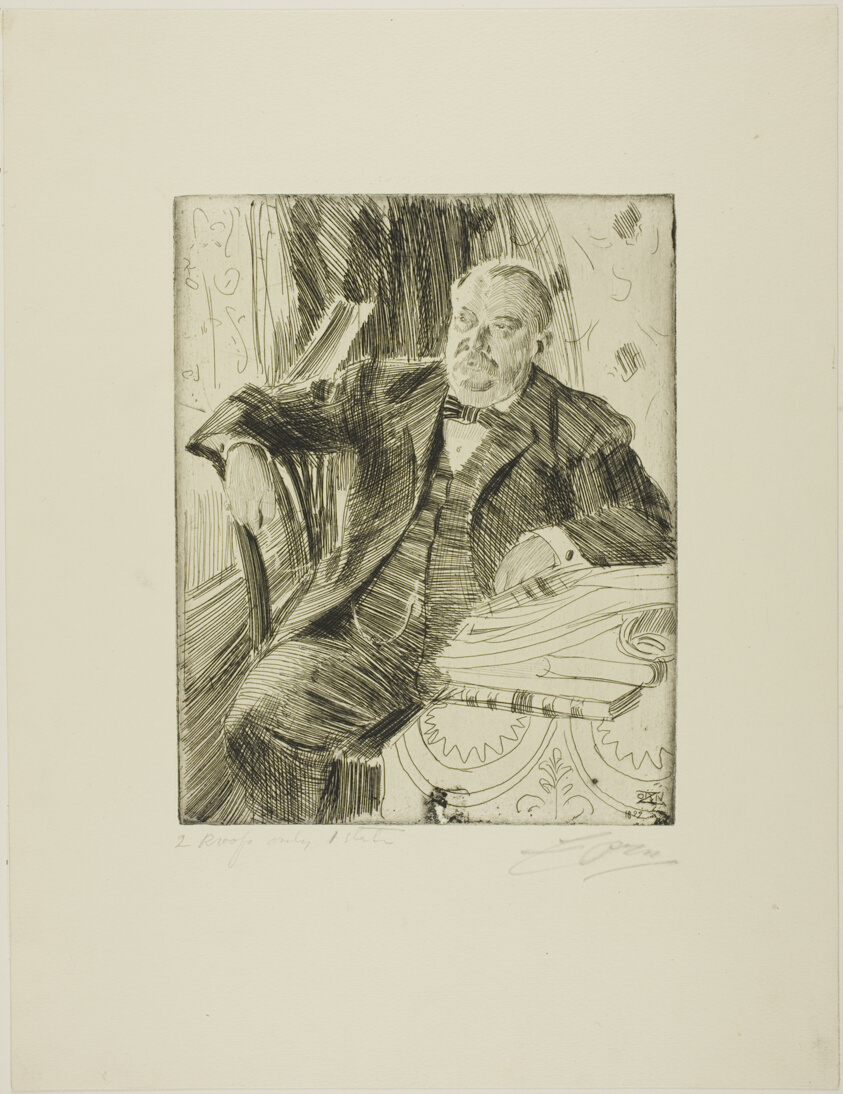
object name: Print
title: Grover Cleveland I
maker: Anders Zorn (Swedish, 1860-1920)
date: 1899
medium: Etching on ivory laid paper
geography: Sweden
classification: etching; print; prints and drawing